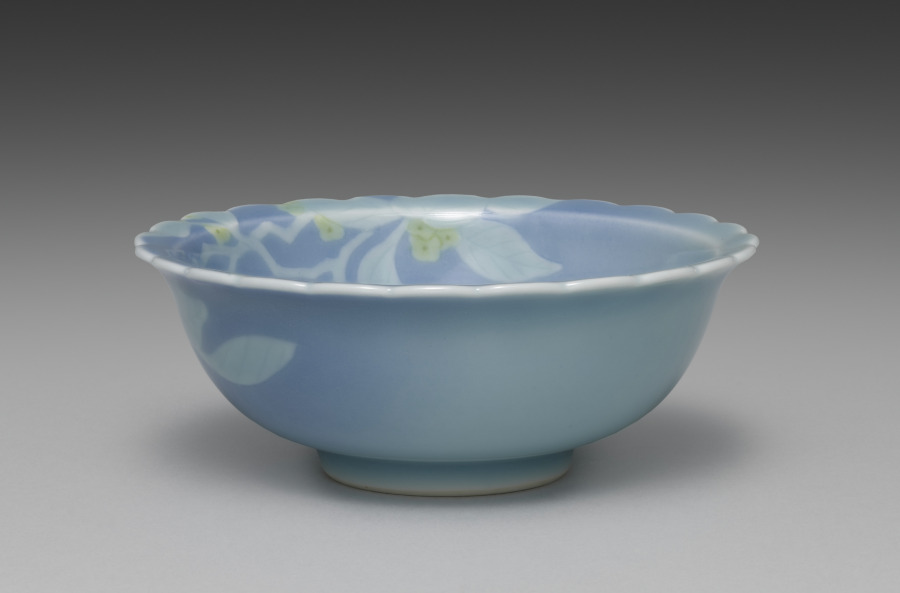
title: Dish from Dishes with Flowers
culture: Japan, Taishō period (1912–26) or Shōwa period (1926–89)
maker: Seifū Yohei IV (Japanese, 1872–1951)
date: 1914–46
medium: One from a set of five dishes; porcelain with underglaze yellow and blue glaze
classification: Ceramic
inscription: 清風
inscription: 清風造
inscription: 成山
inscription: 清風盧人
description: One can imagine a cool summer breeze when looking at this set of dishes, each shaped with a crenulated mouth and glazed with blue. Around the rim and into the basin, the bowls have low-relief designs of flowers with underglaze yellow petals; their leaves and stems show white through the glaze. On each dish, the design continues over the rim onto one side.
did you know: Seifū Yohei IV’s dishes with flowers feature underglaze yellow.